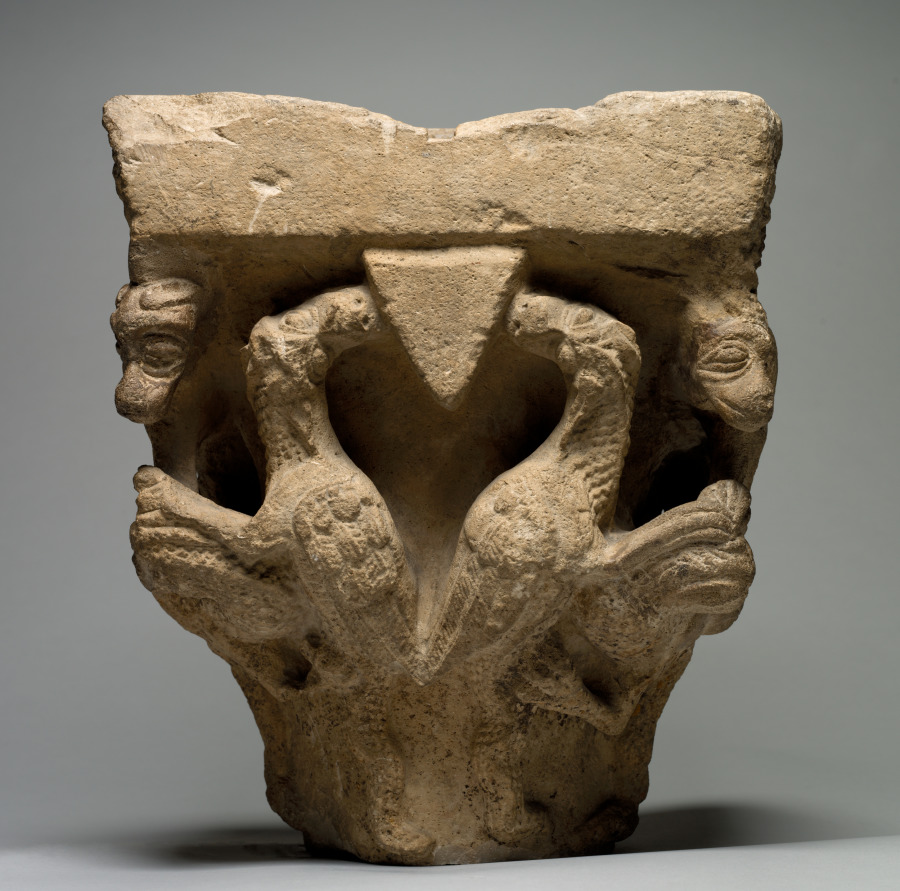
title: Capital with Dragons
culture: Southwest France, Languedoc, Toulouse (?), 13th century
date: 1200s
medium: limestone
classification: Sculpture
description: Monstrous images were prevalent in the decoration of religious buildings during the Middle Ages. Such images must have impressed, perhaps even terrified, the monks and visitors who spent much of their time within the cloister or church, a place of prayer, contemplation, and reflection. Scholars have speculated how such images would have been received by the people given the ubiquity of monsters in medieval society. The carved monsters, often symbolizing vice and retribution for sin, were possibly designed to provoke a range of emotional responses including laughter, wonder, surprise, fear, and shock. This striking imagery must have had a strong impact, which in turn led Saint Bernard of Clairvaux (1090–1153), the spiritual head of the Cistercian order, to admonish their use as distracting from prayer.